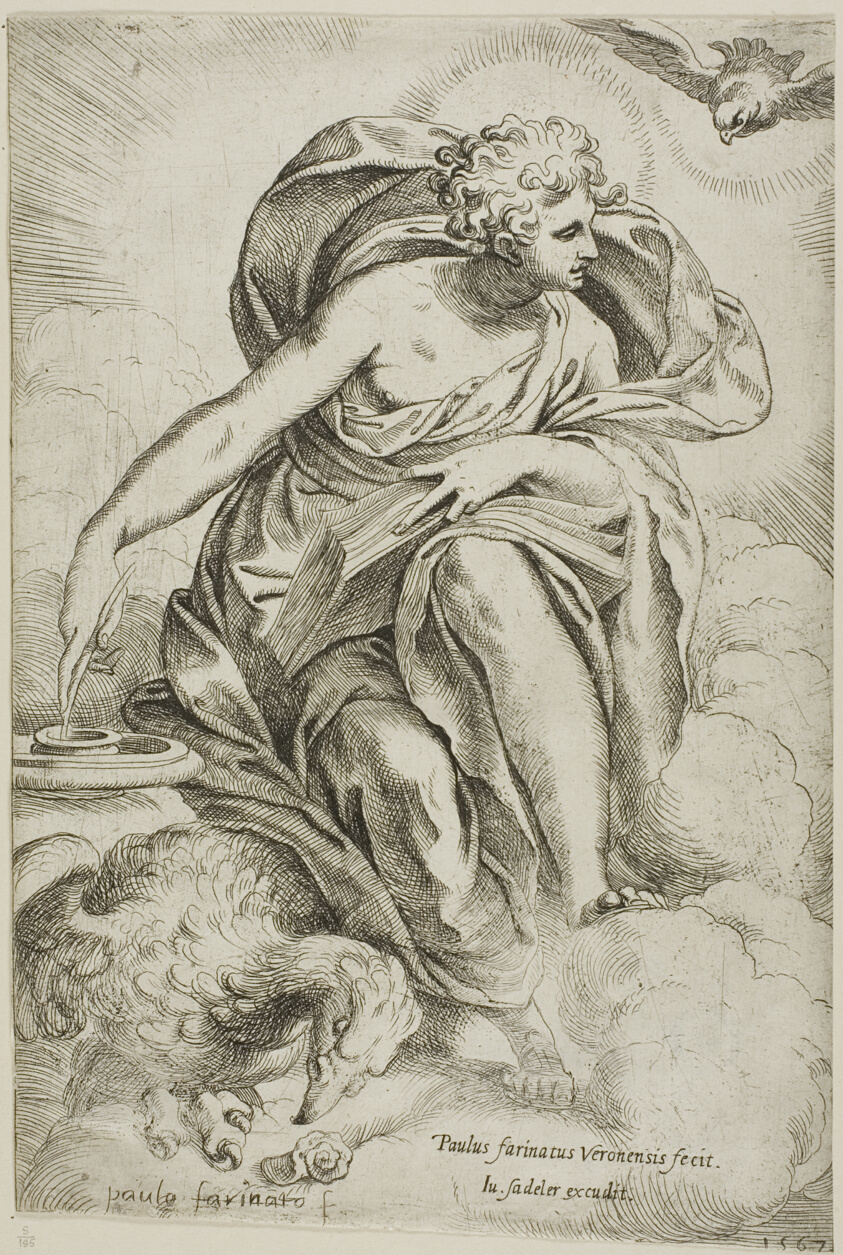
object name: Print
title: Saint John the Evangelist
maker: Paolo Farinati (Italian, 1524-c. 1606)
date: 1567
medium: Etching in black on paper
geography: Italy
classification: print; prints and drawing